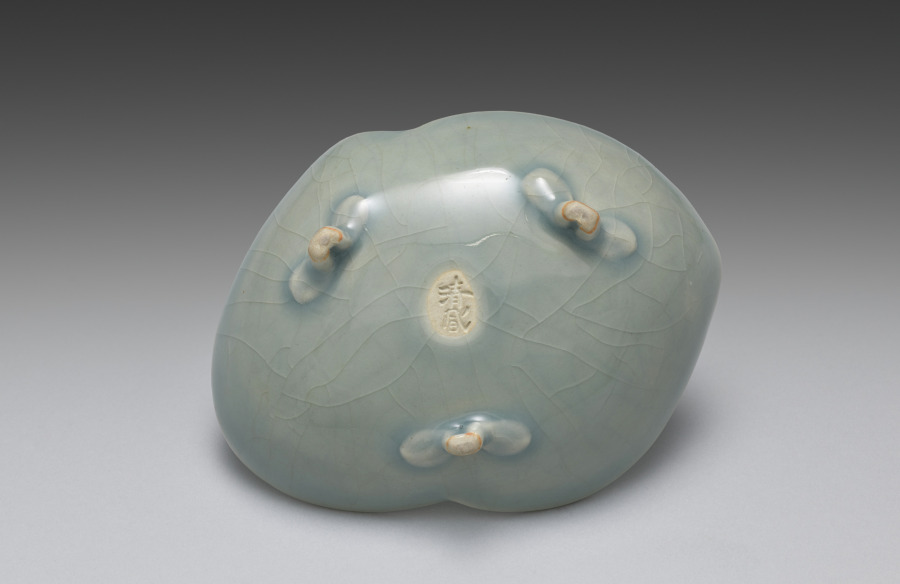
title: Dish from Saucers with Matching Shells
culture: Japan, Meiji period (1868–1912)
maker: Seifū Yohei III (Japanese, 1851–1914)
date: 1893–1914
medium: Porcelain with molded design and green crackled glaze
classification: Ceramic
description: Yohei III’s main output for his sophisticated clientele was in the form of tea sets and dining sets. He created a range of dishes in green glazes. He often produced in pairs, sets of five, or sets of ten. The set of five dishes with a more complex form is described as having a “water-colored glaze” (mizuiroyū). These are shaped like clam half shells, a reference to a game in which shell halves painted with narrative scenes or a variety of motifs must be matched back together by the players. The dishes have molded details to articulate the shell forms, and the crackling across each shell adds another dimension to the surface. Each dish is set on three small feet, formed by a pinched piece of clay and attached to an unglazed area on the underside of the dish. Curiously, while four of the dishes are stamped with the artist’s mark, one has instead a signature carved into the base.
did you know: Each of the paired-shell dishes has its own compartment in a long, flat box.